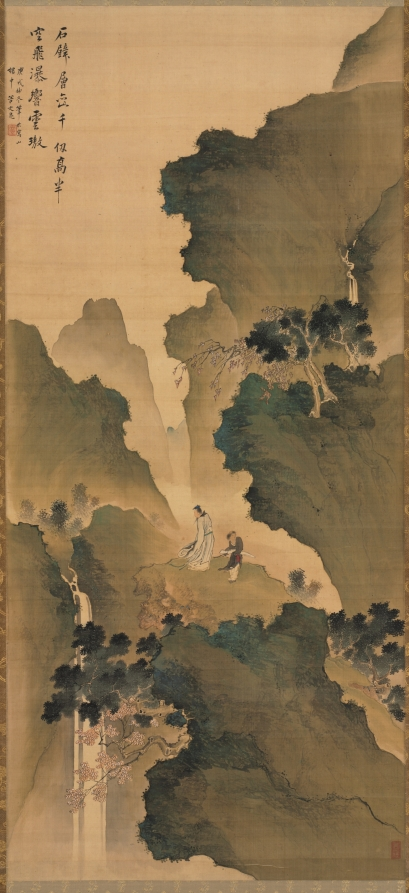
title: Gazing at a Waterfall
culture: Japan, Edo period (1615–1868)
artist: Tani Bunchō (Japanese, 1763–1841)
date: 1790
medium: hanging scroll; ink and color on silk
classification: Painting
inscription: The stone cliff of layered rocks is extremely high. Waterfalls tumbling from the skies reverberate in the clouds.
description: Artist Tani Bunchō painted this image in a mountain pavilion during winter. He inscribed it with two lines of a poem: “The stone cliff of layered rocks is extremely high. Waterfalls tumbling from the skies reverberate in the clouds.” The scholarly figure and attendant carrying his qin (a stringed instrument) are set amid majestically soaring mountains in China. For many people in Japan at the time, the image would call to mind a poem about a waterfall at Mount Lu by Chinese poet Li Bai (701–762).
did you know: Drive about eight hours west of Shanghai to get to Mount Lu, the mountain range likely alluded to in this painting.